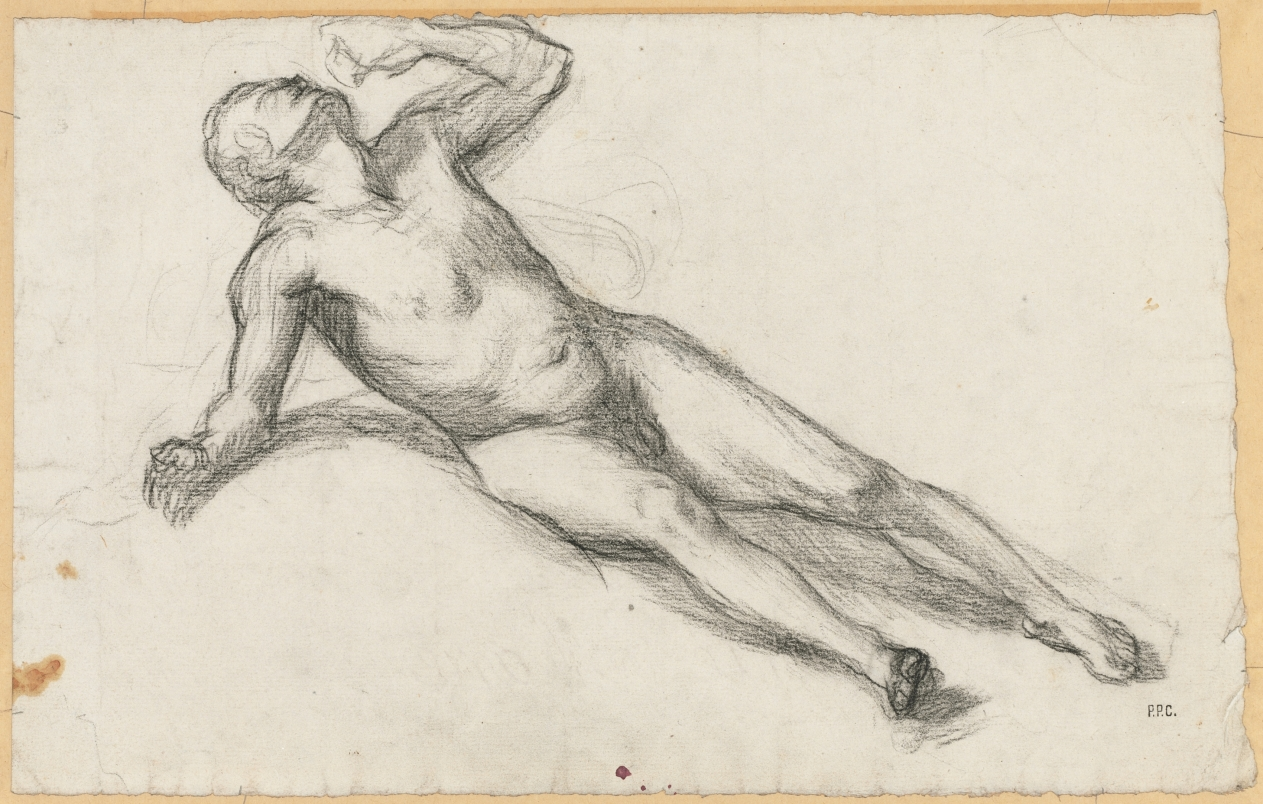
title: Study for The War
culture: France, 19th century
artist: Pierre Puvis de Chavannes (French, 1824–1898)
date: 1861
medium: charcoal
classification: Drawing